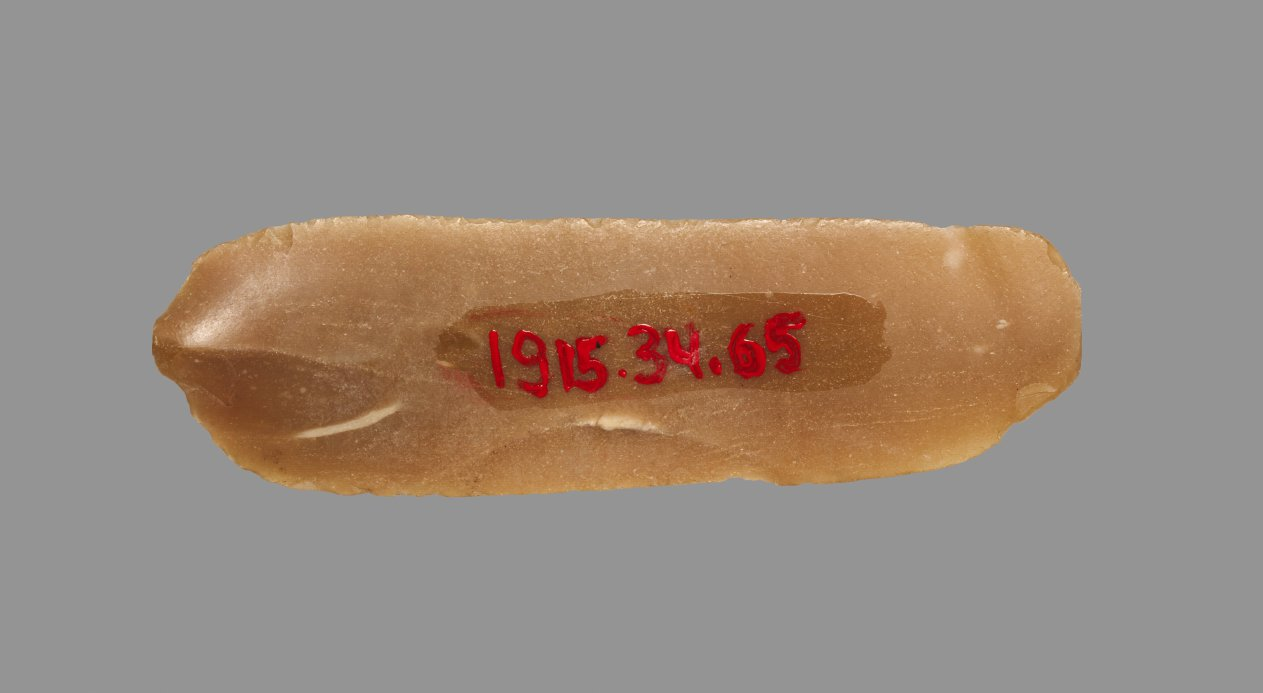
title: Sickle Blade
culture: Egypt, Middle Kingdom (2040–1648 BCE), Dynasty 12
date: 1980–1801 BCE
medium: flint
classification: Implements